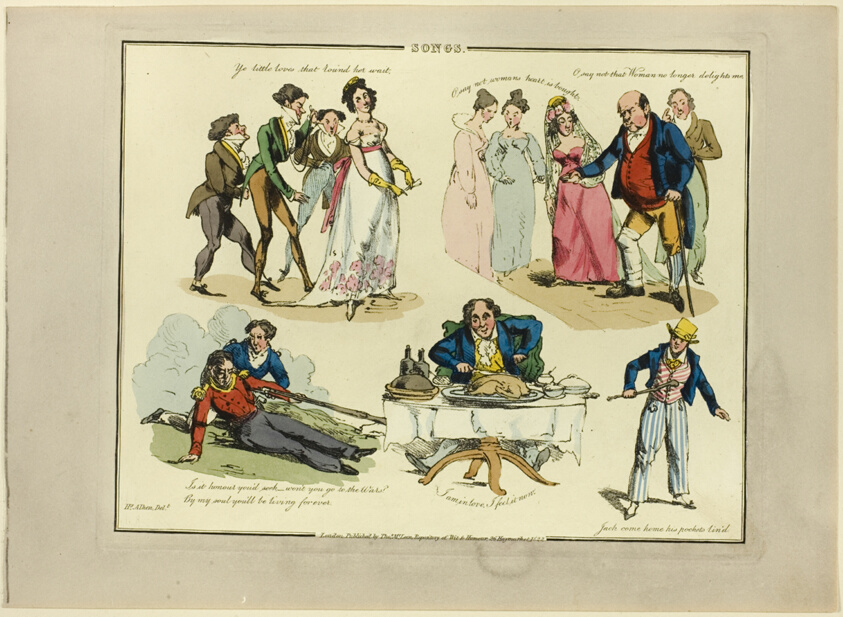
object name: Print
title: Plate from Illustrations to Popular Songs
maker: Henry Alken (English, 1785-1851); published by Thomas McLean (English, active 1790-1860)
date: 1822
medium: Soft ground etching with hand-coloring and aquatint on paper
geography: England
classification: etching; print; prints and drawing